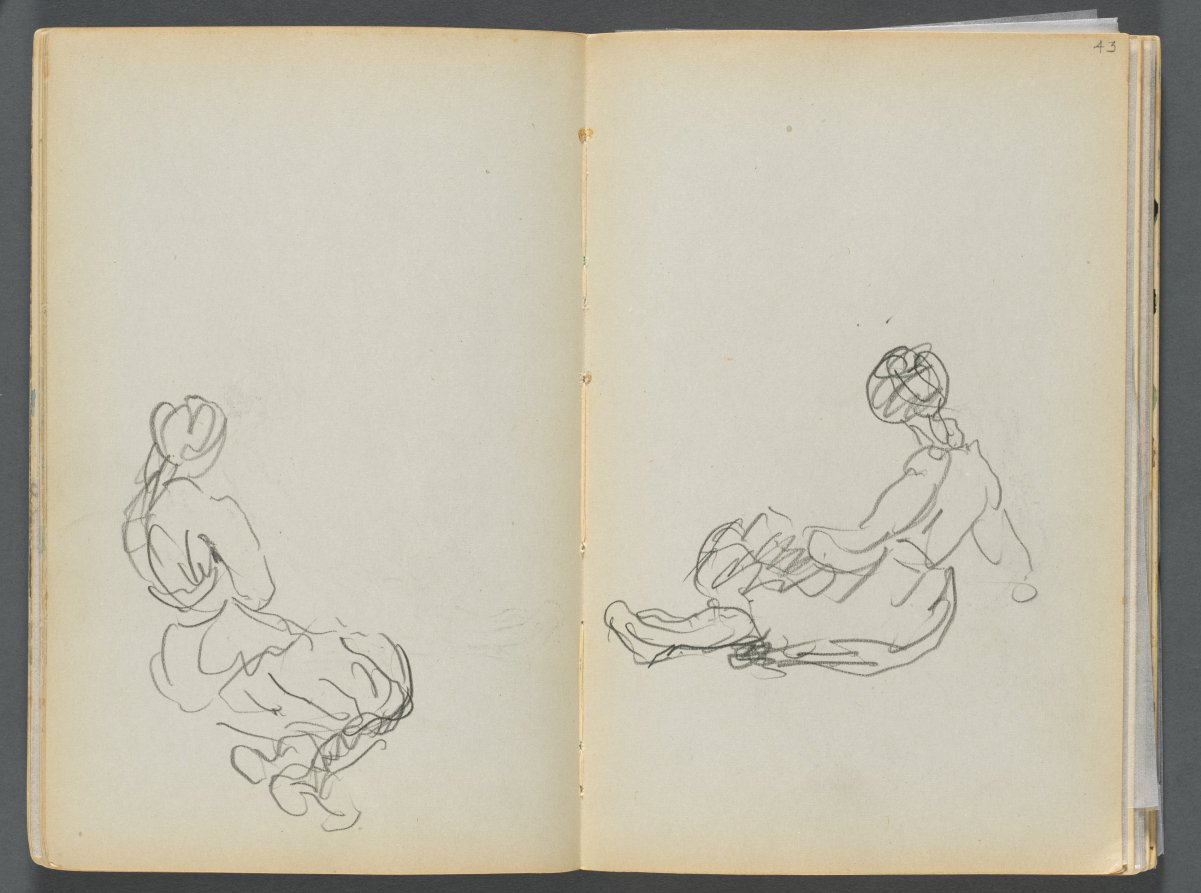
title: Sketchbook- The Granite Shore Hotel, Rockport, page 042 & 43: Two Seated Female Figures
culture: America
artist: Maurice Prendergast (American, born Newfoundland [now Canada], 1858–1924)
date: 1905–10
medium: graphite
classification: Bound Volume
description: This sketchbook contains 72 pages of pencil drawings and 9 watercolors of Cape Ann. On the inside of the cover Prendergast wrote the address of the Granite Shore Hotel in Rockport, Massachusetts.